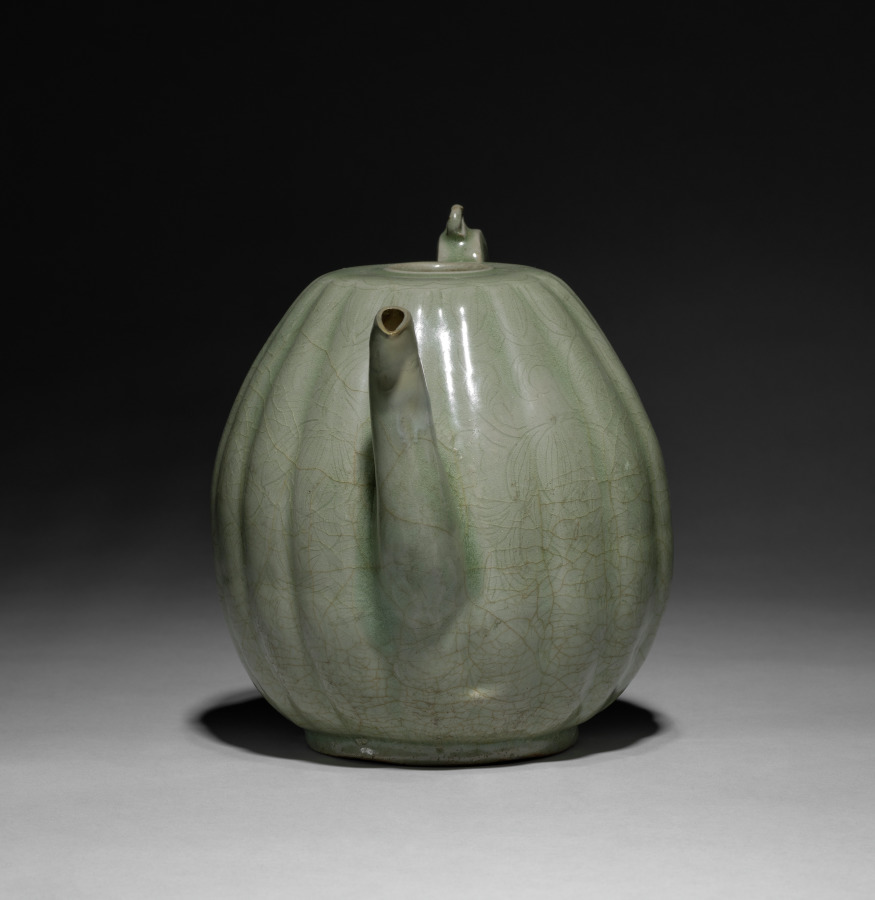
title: Wine Pot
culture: Korea, Goryeo dynasty (918–1392)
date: 918–1392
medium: pottery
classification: Ceramic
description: As early as the seventh century, the practice of drinking tea and wine became an important part of elite culture in Korea. Elites of the Goryeo period commissioned a variety of types of utensils and vessels including this elegant pot, not only to make their drinking experience more exciting, but also to show their appreciation of nature.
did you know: Originally the lid was not coupled with this pot.